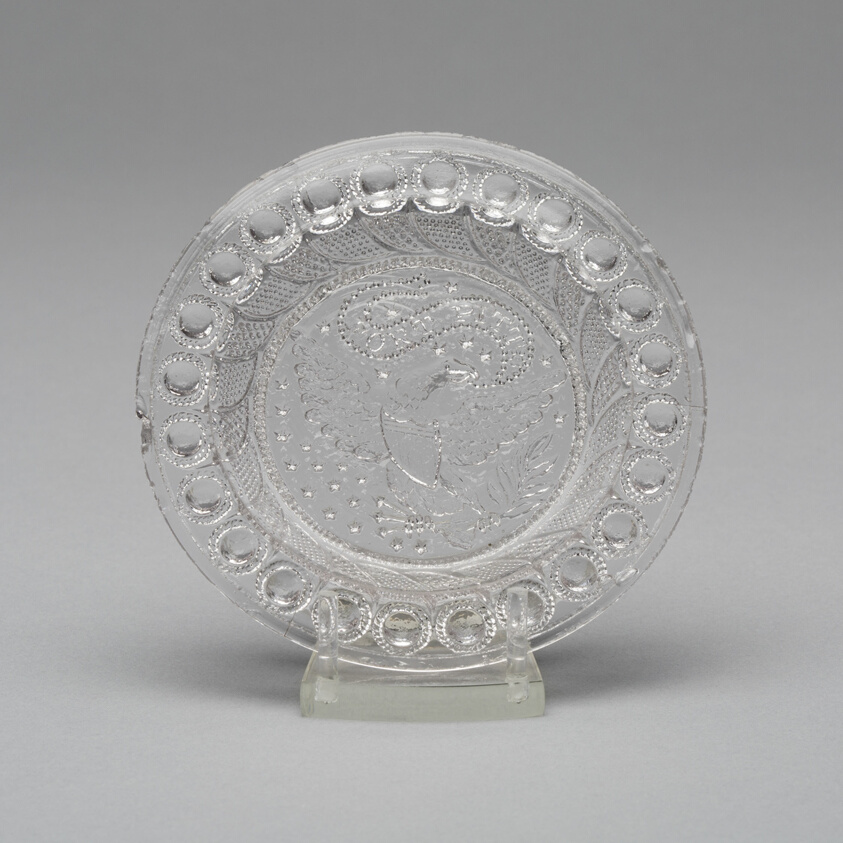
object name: Glass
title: Cup plate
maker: Fort Pitt Glass Works; American, 1827–c. 1903; Pittsburgh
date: 1830–35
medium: Pressed glass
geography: Pittsburgh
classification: plate (general, dish); glass; american decorative arts; american arts; decorative arts